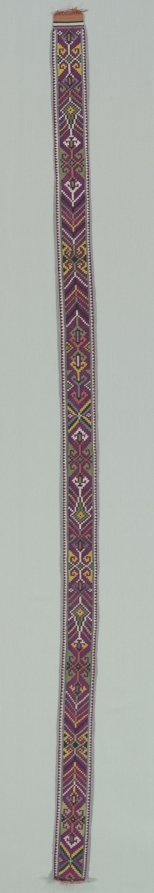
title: Belt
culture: Guatemala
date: c. 1900s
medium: cotton, tapestry weave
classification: Garment